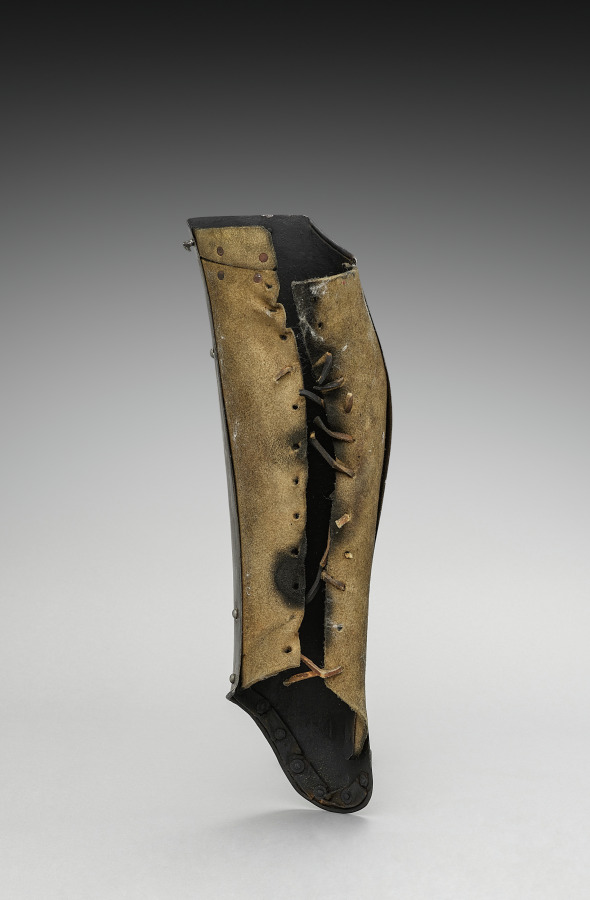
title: Right Greave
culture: Germany, 19th century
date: 1801–1900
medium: steel with black paint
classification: Arms and Armor